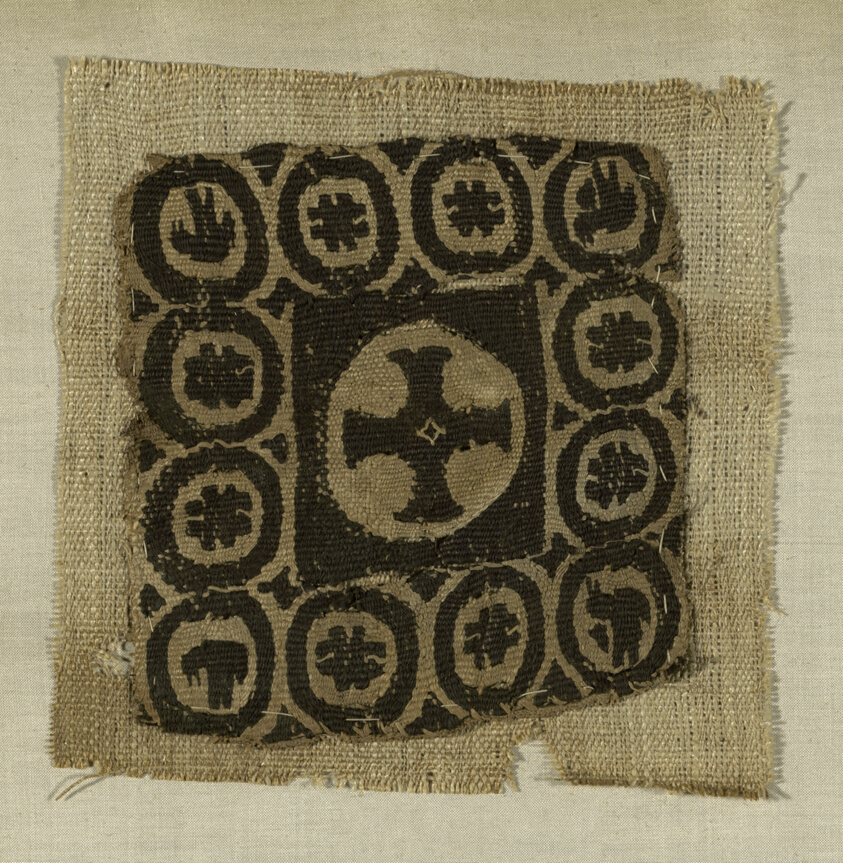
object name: Textile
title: Panel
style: roman period (egyptian)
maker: Coptic (Egypt)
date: Roman period (30 B.C.– 641 A.D.), 5th/6th century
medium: Linen and wool, tapestry weave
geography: Egypt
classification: textile; weaving